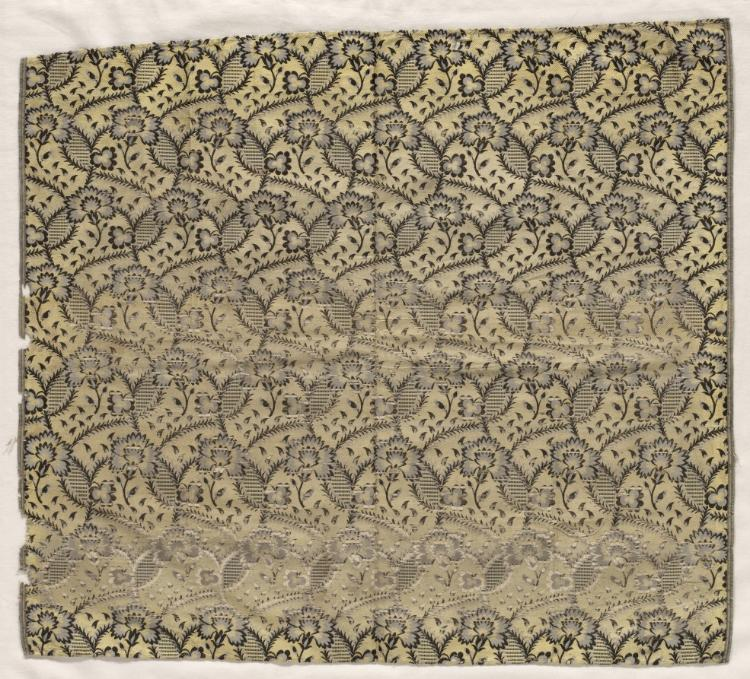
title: Fragment of Spitalfields Silk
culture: England, Spitalfields, 19th century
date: 1800s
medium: silk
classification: Textile